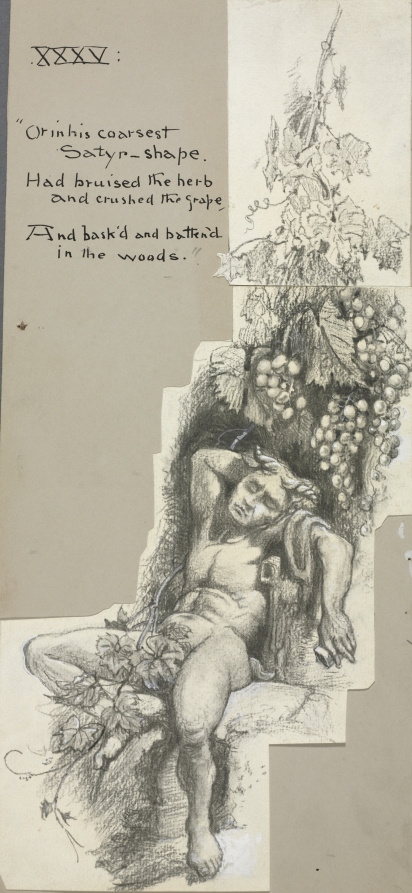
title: Bacchanale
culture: America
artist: Harry Fenn (American, 1838/45–1911)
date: before 1897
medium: pencil with white ink corrections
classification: Drawing